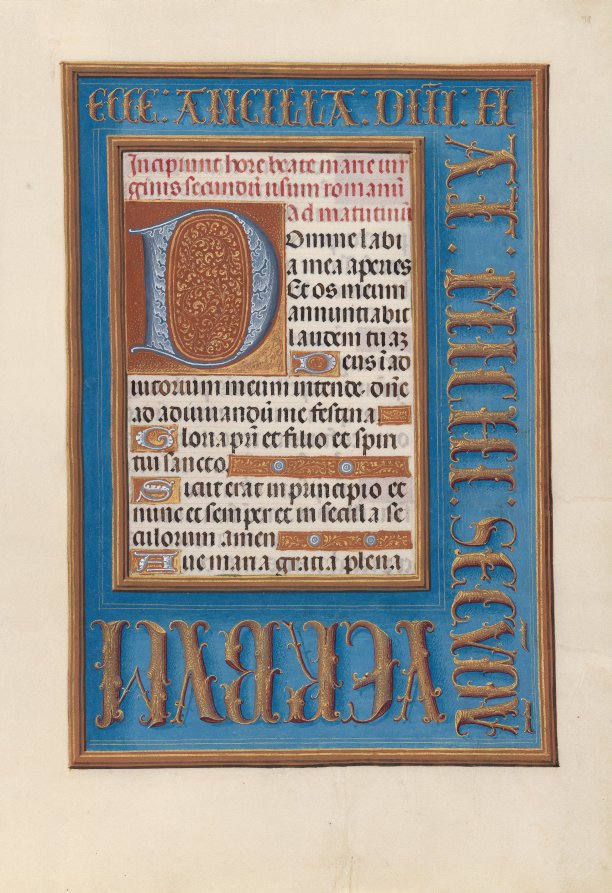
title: Hours of Queen Isabella the Catholic, Queen of Spain: Fol, 98r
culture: Flanders, Ghent and Bruges, late 15th century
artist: Master of the First Prayerbook of Maximillian (Flemish, c. 1444–1519)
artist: and Associates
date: c. 1500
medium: ink, tempera, and gold on vellum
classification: Bound Volume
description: This manuscript was illuminated by a circle of at least five highly organized manuscript painters active in the Flemish cities of Ghent and Bruges. The principal illuminator was Alexander Bening, who painted the majority of the book's miniatures. Manuscripts produced by this circle of artists are renowned for the decoration of their borders, which typically feature a rich variety of realistically-painted flowers, birds, and butterflies. This prayer book, called a book of hours, was intended not for a cleric, but for the private devotions of a lay person-in this case, Isabella the Catholic, Queen of Spain (1451-1504). Isabella's coat of arms embellishes the book's frontispiece. It is unlikely that the book was commissioned by the Queen herself; rather, she probably received it as a diplomatic gift from someone courting her patronage, perhaps Cardinal Francisco Jimenez de Cisneros. A Franciscan friar, Jimenez was dependent upon Isabella for his advancement, first to the post of Queen's confessor in 1492, and then to Archbishop of Toledo in 1495.